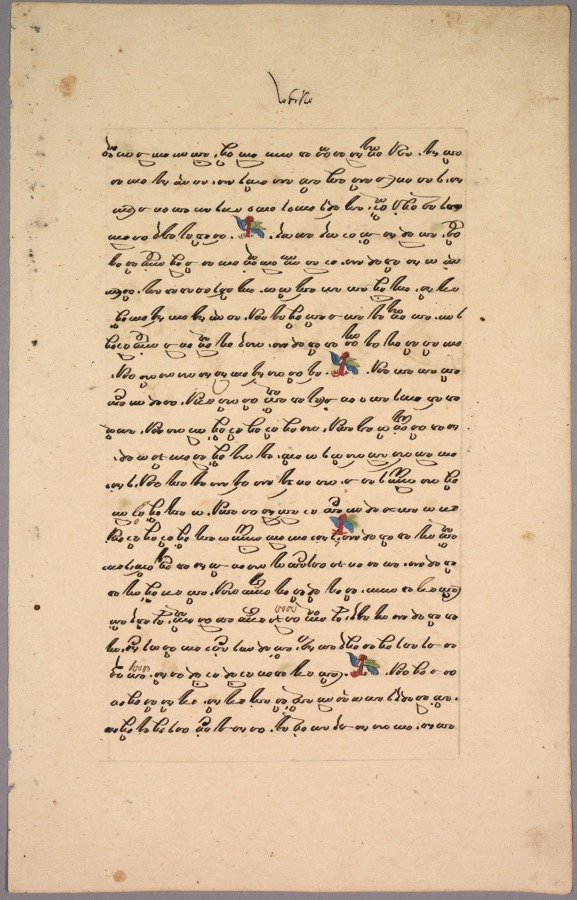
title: Page from Ramayana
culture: Java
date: 1800s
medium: ink on paper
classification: Manuscript